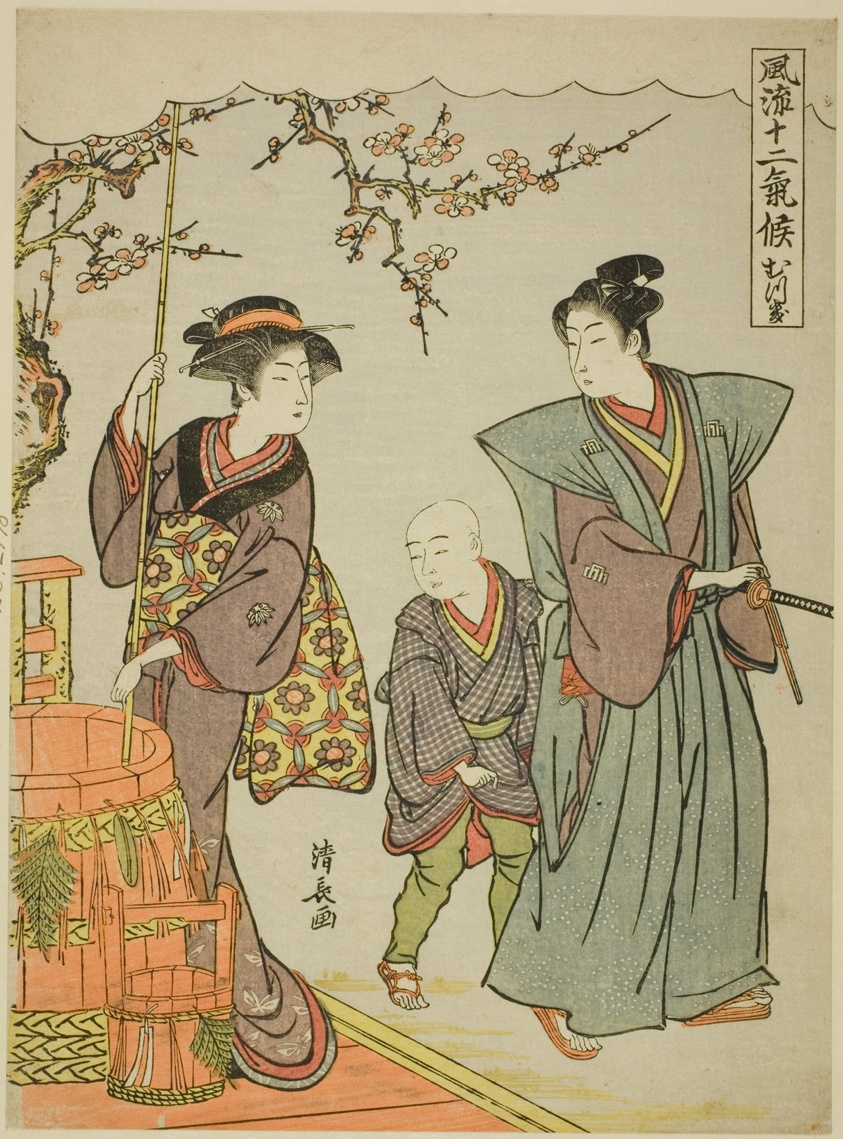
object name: Print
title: The First Month (Mutsuki), from the series "Fashionable Twelve Seasons (Furyu juni kiko)"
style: Japanese (culture or style)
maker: Torii Kiyonaga (Japanese, 1752-1815)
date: c. 1779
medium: Color woodblock print; chuban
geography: Japan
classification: woodblock print; print; asian art